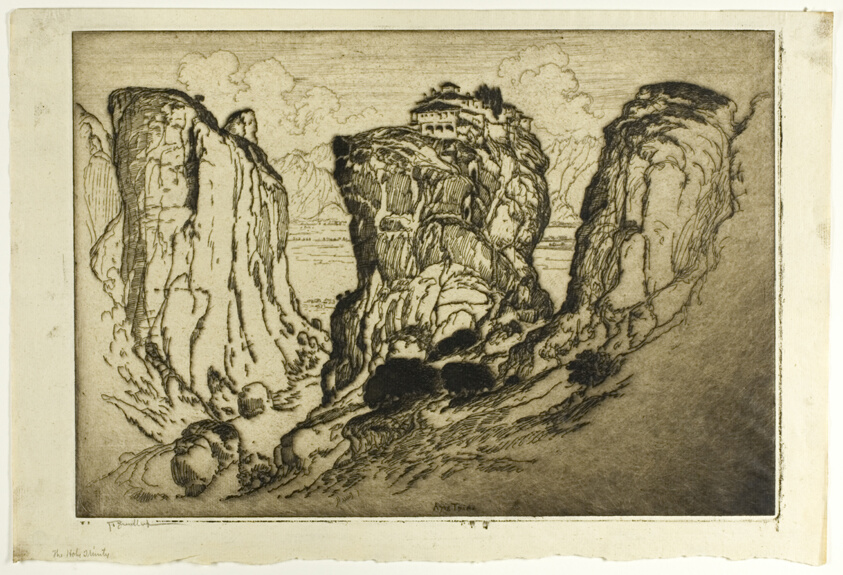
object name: Print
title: The Holy Trinity of the Castles in the Air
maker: Joseph Pennell (American, 1857-1926)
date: 1913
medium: Etching in brownish ink on ivory laid paper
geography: United States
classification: etching; print; prints and drawing